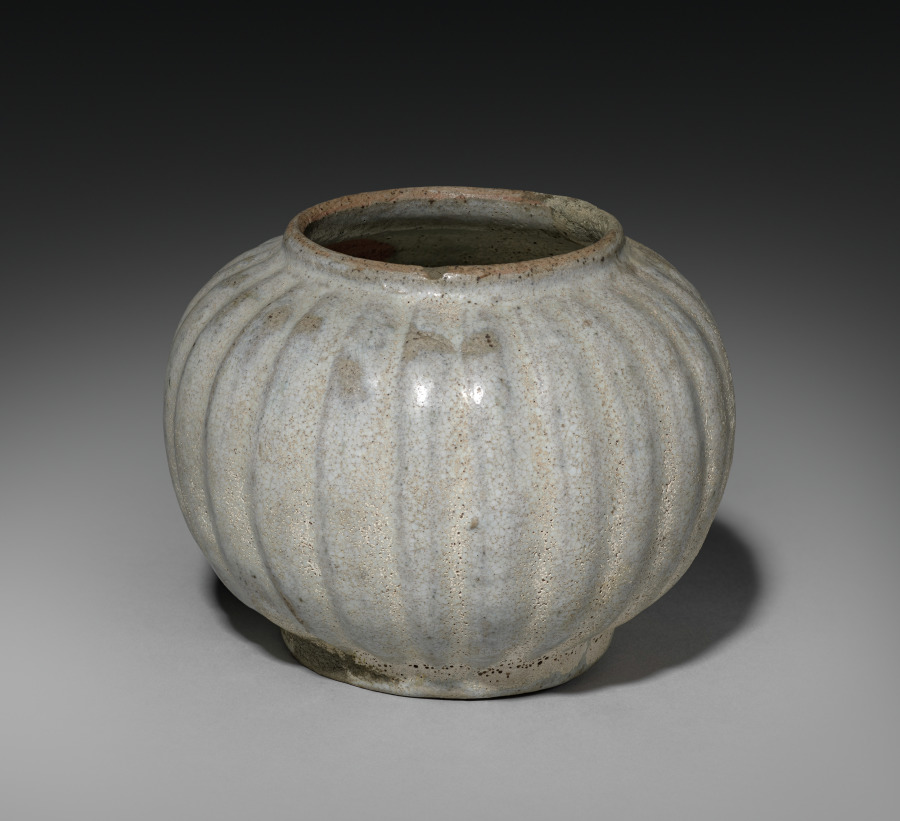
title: Jar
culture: Siam, Sawankhalok ware, late 13th-14th Century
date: late 1200s-1300s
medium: stoneware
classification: Ceramic